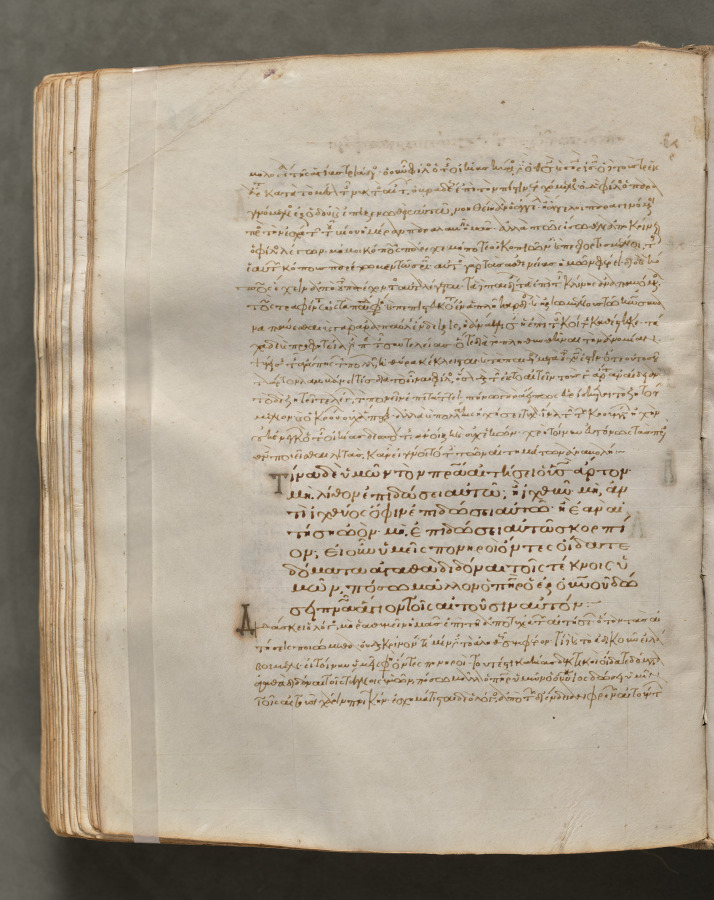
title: Text, folio 259 (verso), from a Gospel Book with Commentaries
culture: Byzantium, Constantinople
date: c. 1000–1100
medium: ink, tempera, and gold on vellum; leather binding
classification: Bound Volume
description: Each of the four gospels in this book opens on a page with brilliantly illuminated borders depicting the author of the text as well as birds—principally peacocks, symbols of the immortality of the soul—and fountains, representing the fountain of life and the salvation of the soul. This volume consists of 428 leaves with texts in Greek. Its level of sophistication suggests that it was probably written and decorated in a monastery in Constantinople.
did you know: Gospel books were carried in procession through Byzantine churches.